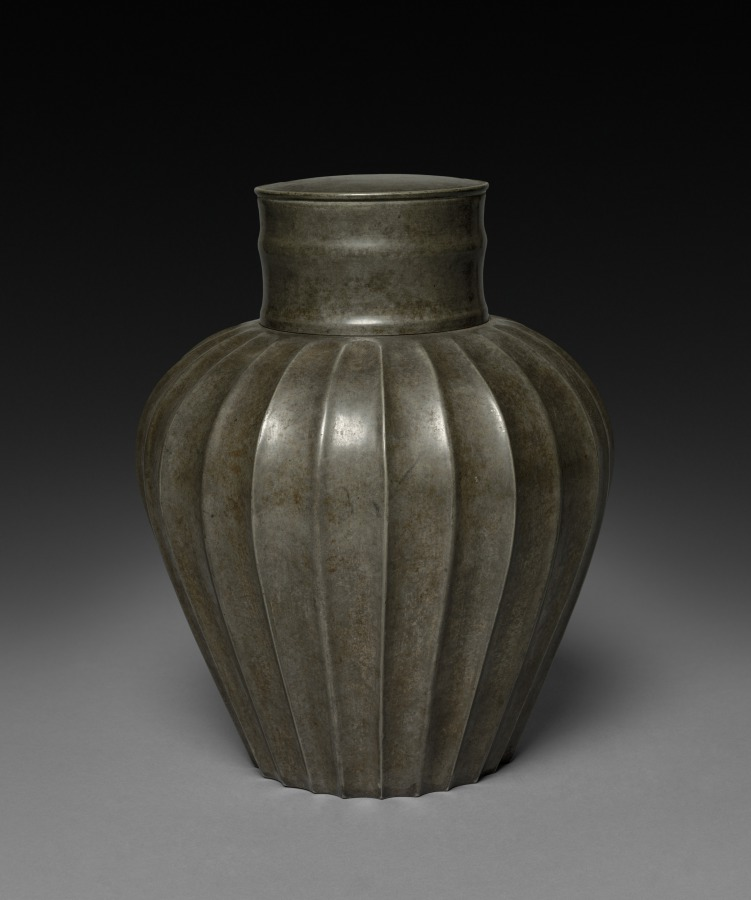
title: Jar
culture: Japan, Edo period (1615–1868)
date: 1600s-1800s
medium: pewter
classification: Metalwork